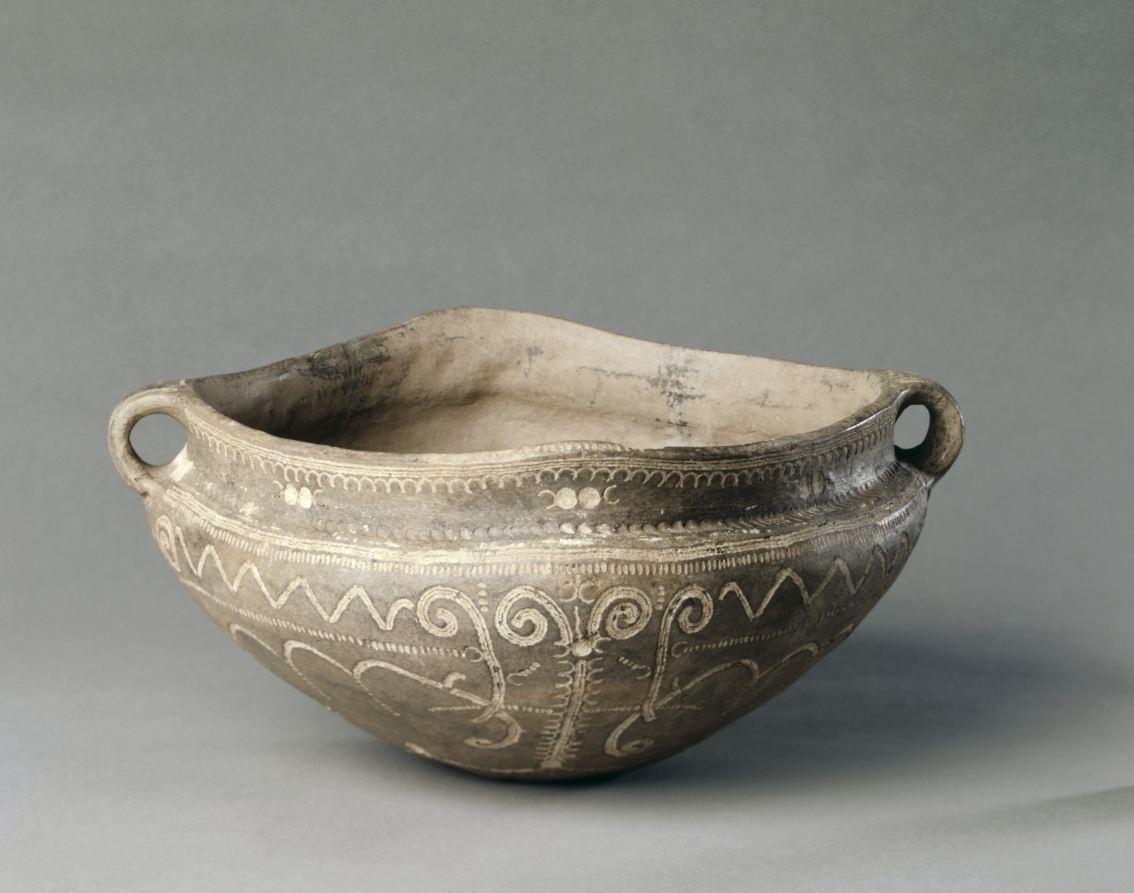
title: Large Bowl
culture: Romania, possibly Cirna, middle Bronze Age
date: c. 1500 BCE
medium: burnished earthenware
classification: Ceramic